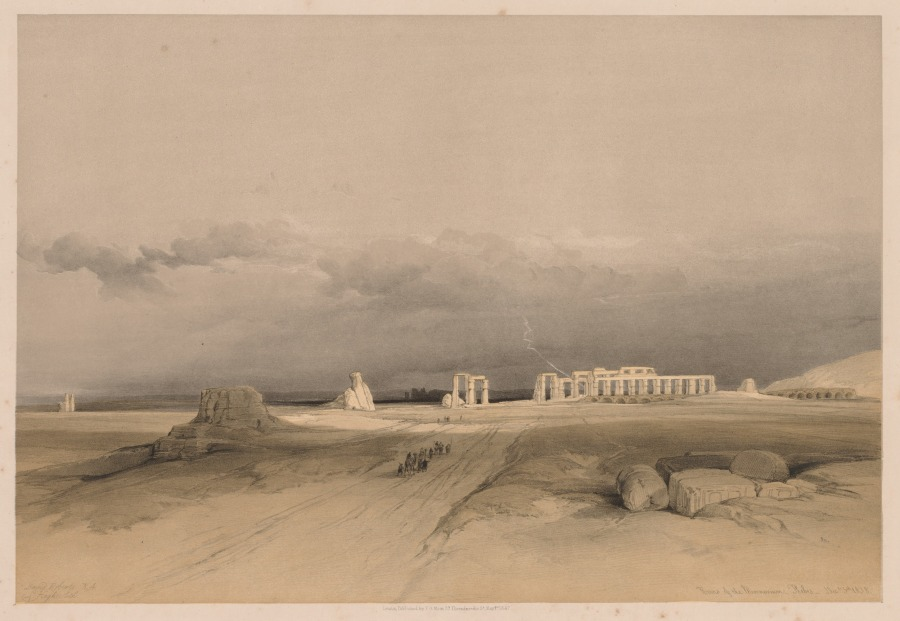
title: Egypt and Nubia: Volume II - No. 8, Ruins of the Memnonium, Thebes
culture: England, 19th century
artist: Louis Haghe (British, 1806–1885)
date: 1838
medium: color lithograph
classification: Print